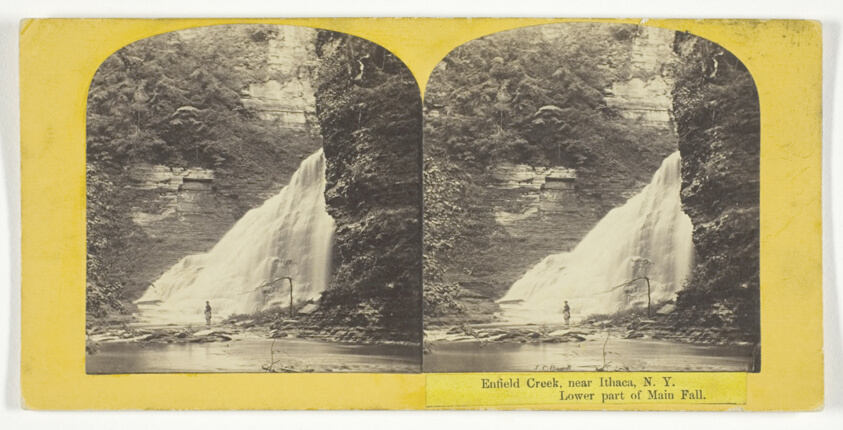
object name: Photograph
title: Enfield Creek, near Ithaca, N.Y. Lower part of Main Fall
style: 19th century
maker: J. C. Burritt; American, active 1860s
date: 1860/65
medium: Albumen print, stereo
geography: Ithaca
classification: photography; photograph; albumen silver print; stereograph (albumen)